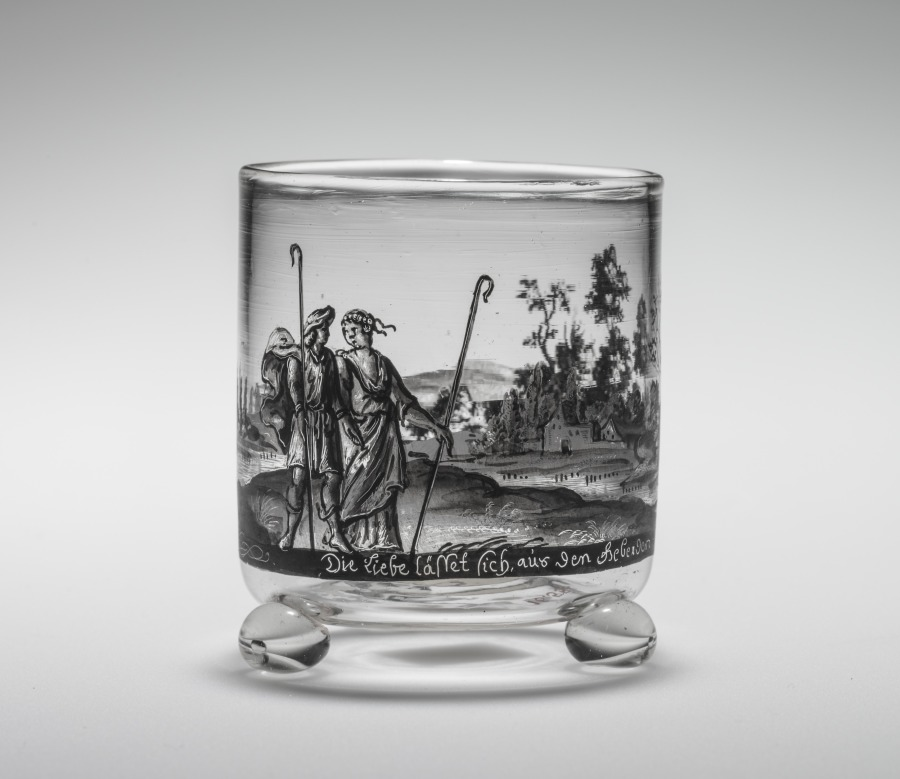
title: Tumbler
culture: Germany, Nuremberg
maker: attributed to Johann Schaper (German, 1635–1670)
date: 1670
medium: glass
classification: Glass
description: Johann Schaper (1621-1670) was a German painter of stained glass, mainly working in Nuremberg and Regensberg, who later turned to decorating glass and ceramics from his home, typical of artisans in the 17th century (hausmaler). His style was mainly a linear one in the manner of engravings, and often he worked in black (schwarzlot) or dark colors. Schaper was so influential that other artisans tried to copy his technique, in which he scratched out details with a needle, with varying degrees of success.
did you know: The fine details of the decoration on this tumbler were achieved by scratching away the enamel with a needle.